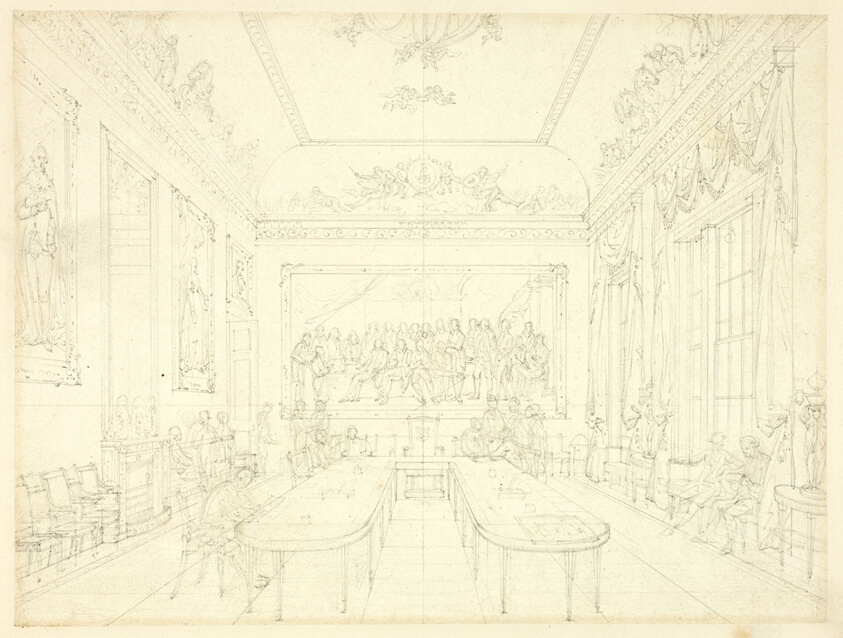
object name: Drawing and Watercolor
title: Study for Trinity House, from Microcosm of London (recto); Architectural Sketch of Row House Facades (verso)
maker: Augustus Charles Pugin (English, born France, 1762-1832); Thomas Rowlandson (English, 1756-1827)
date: c. 1809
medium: Graphite (recto and verso) on ivory wove paper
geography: England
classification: graphite; drawings (visual works); prints and drawing